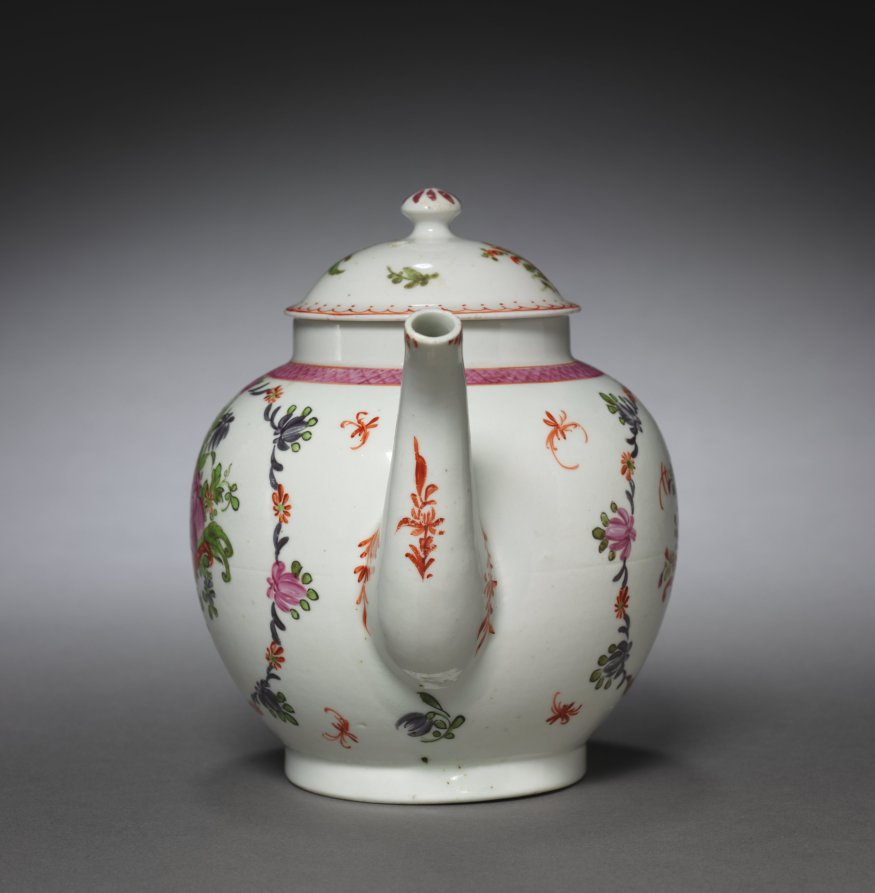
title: Teapot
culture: Staffordshire, England, late 18th century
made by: New Hall Porcelain Factory (British)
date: c. 1782–1790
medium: porcelain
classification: Ceramic